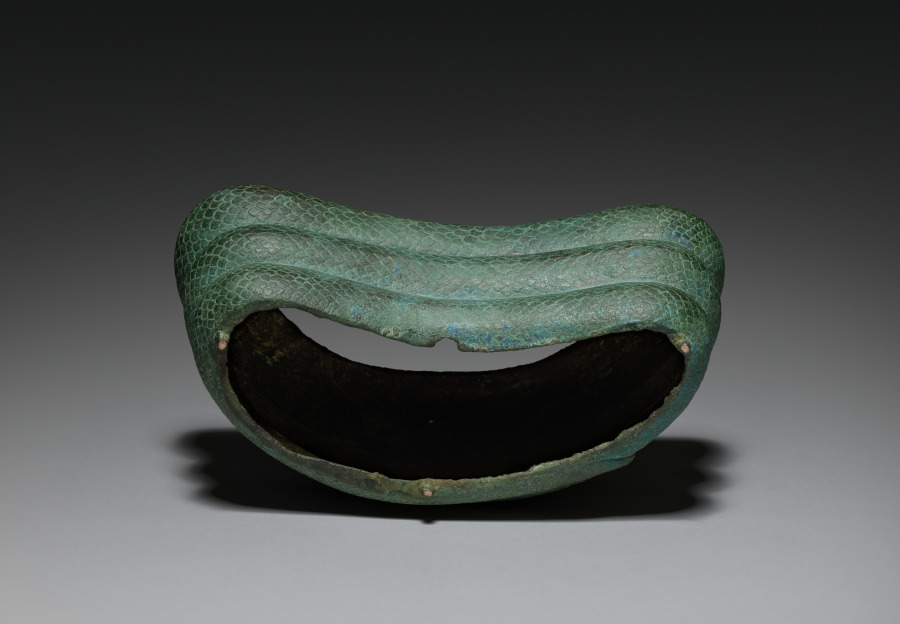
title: Naga-enthroned Buddha (base)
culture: Cambodia, Angkor, Angkor Wat Period, 12th century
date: 1100–1150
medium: bronze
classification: Sculpture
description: Jayavarman VII, who built the great royal temple at Banteay Chhmar, linked himself with the image of the Buddha seated on a serpent, or naga, as the divine form under which he would be honored. During his reign, the naga-enthroned Buddha became a ubiquitous image for veneration, often set up together with Lokeshvara, who was associated with his father, and Prajnaparamita, the form under which his deceased mother was honored. Lokeshvara is the powerful enlightened being of compassion, while Prajnaparmita is the goddess who personifies wisdom. King Jayavarman VII, therefore, presented himself as the enlightened Buddha, the product of the union of Compassion and Wisdom, supported and glorified by the naga, which refers to the Khmer people. Images of the naga-enthroned Buddha have been found at Banteay Chhmar, both in architectural relief sculpture and as icons in the round. After the death of Jayavarman VII, followers of other forms of Buddhism (for example, Theravada) that became prevalent in Cambodia changed the meaning of the naga-enthroned Buddha and reinterpreted the image to refer to a scene from the historical Buddha’s life story in which a serpent protected him from a flood. The crowned and bejeweled aspect of this Buddha, though, indicates that it is another kind of transcendent figure. In his lap his hands are in a posture of meditation, holding what appears to be an offering of ceremonial rice referring to the hope that he will ensure the prosperity of the land.